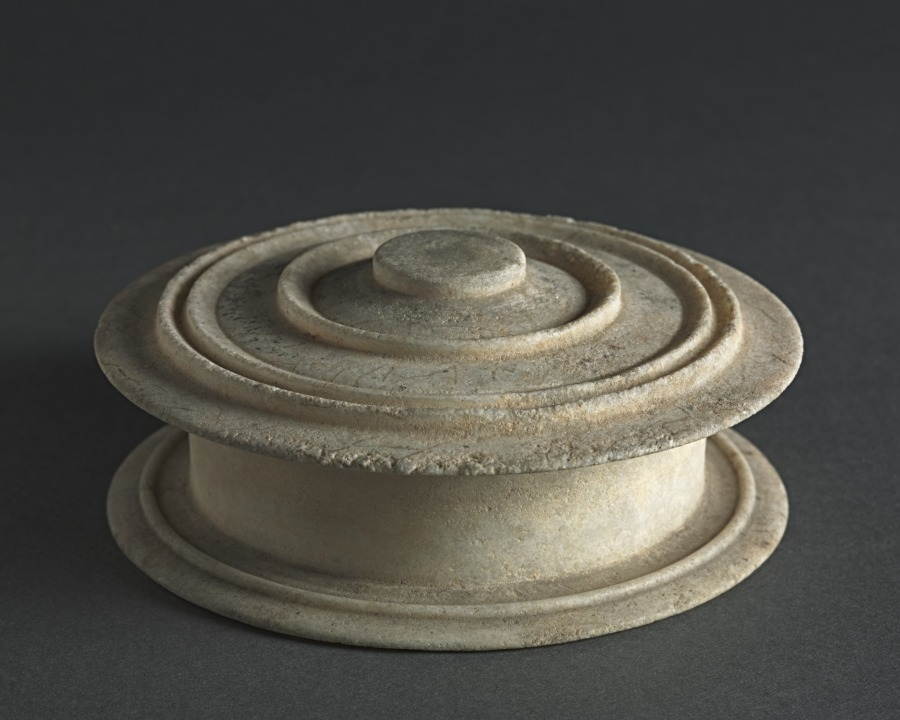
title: Pyxis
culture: Greece, Attic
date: 400–300 BCE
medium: marble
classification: Stone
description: Pyxides came in a huge variety of sizes, shapes, and materials in the ancient world. Images of pyxides in Greek art often show them being used by women, which has led scholars to believe that they may have been used to hold jewelry or cosmetics. This pyxis is one of few surviving examples made from stone, signifying that it may have had an elite owner.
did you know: This vessel has a threaded lid, like a modern mason jar, allowing it to be tightly sealed.